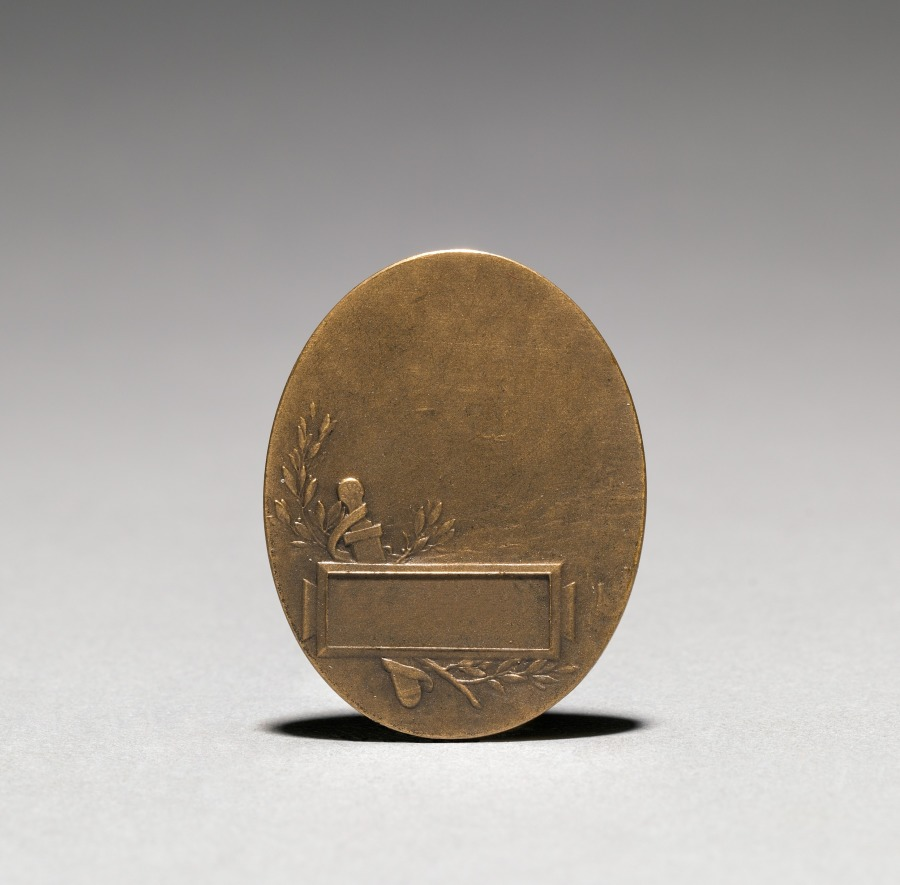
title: Medallion (reverse)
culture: France, 19th-20th century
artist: Jean Paul Aube (French, 1837–1916)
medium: bronze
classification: Metalwork